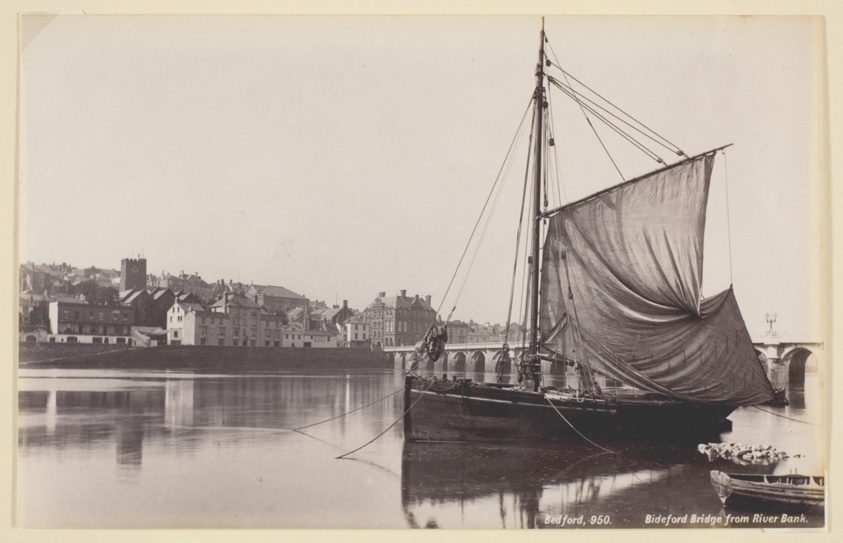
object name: Photograph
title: Bideford Bridge from River Bank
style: 19th century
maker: Francis Bedford (English, 1816–1894)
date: 1860/94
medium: Albumen print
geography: England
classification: albumen silver print; photographic process; photography; photograph